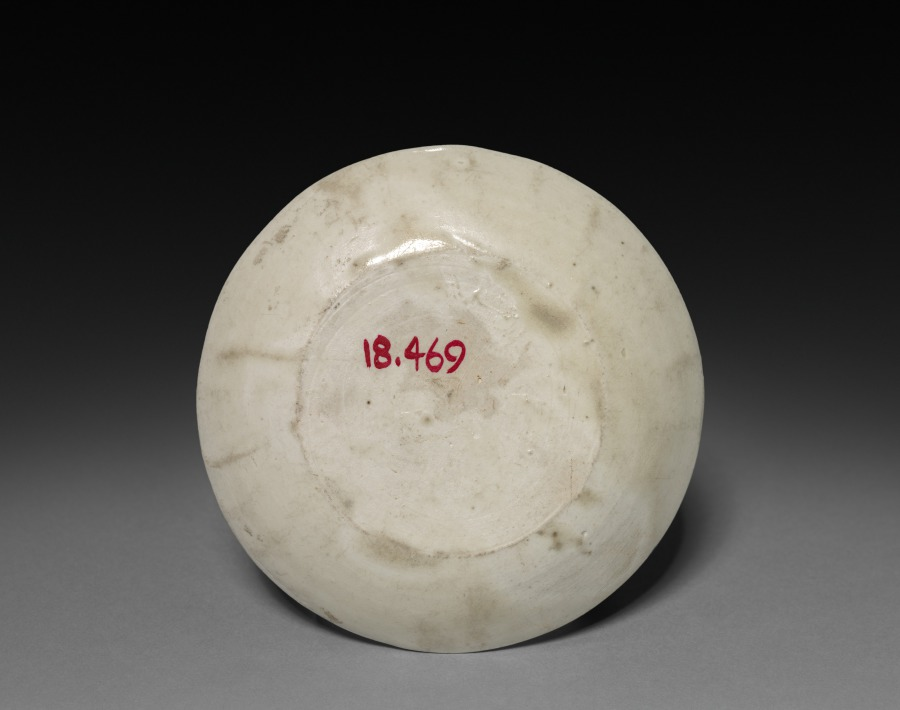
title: Saucer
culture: China, Jin dynasty (1115-1234)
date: 1100s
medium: glazed grayish-white porcelain, Ding ware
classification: Ceramic